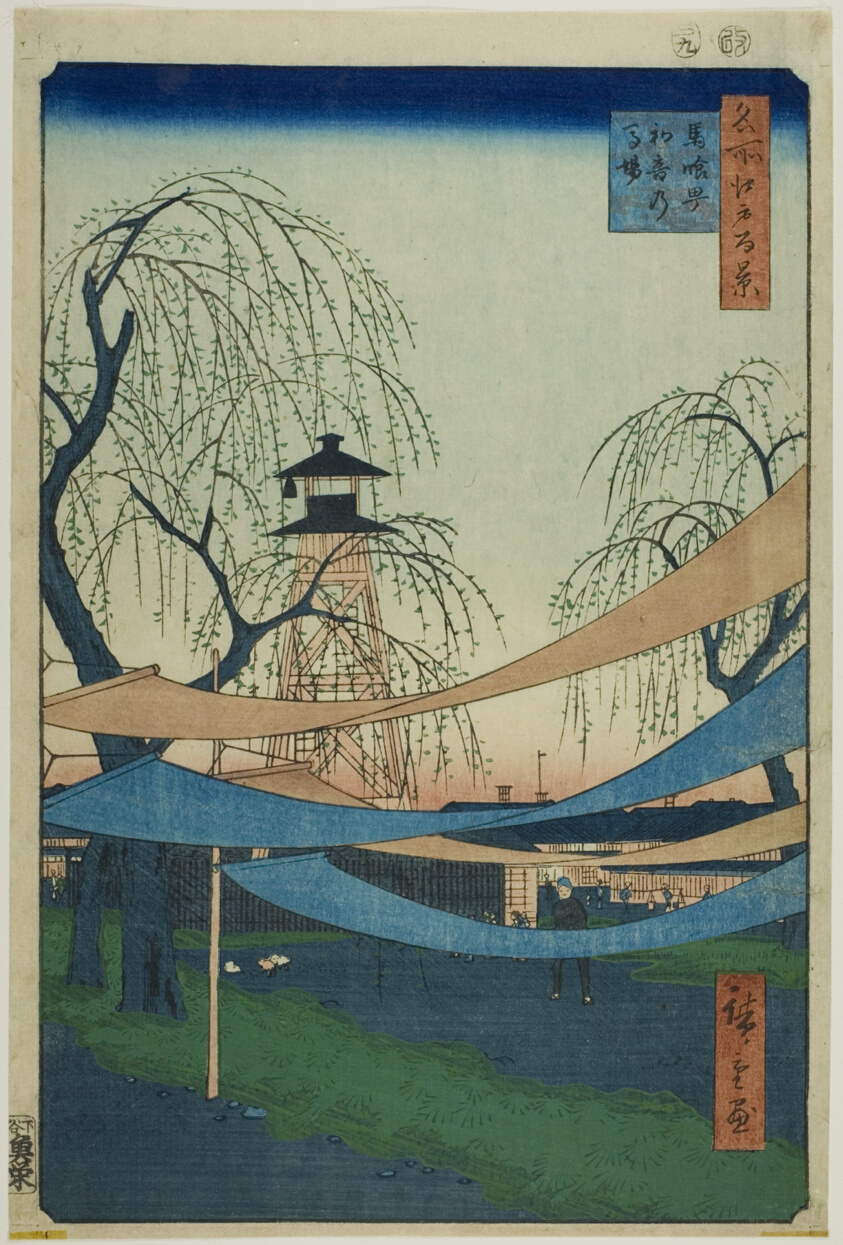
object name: Print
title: The Hatsune Riding Grounds at Bakuro-cho (Bakuro-cho Hatsune no Baba), from the series "One Hundred Famous Views of Edo (Meisho Edo hyakkei)"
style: Japanese (culture or style)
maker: Utagawa Hiroshige 歌川 広重; Japanese, 1797–1858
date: 1857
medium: Color woodblock print; oban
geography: Japan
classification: woodblock print; print